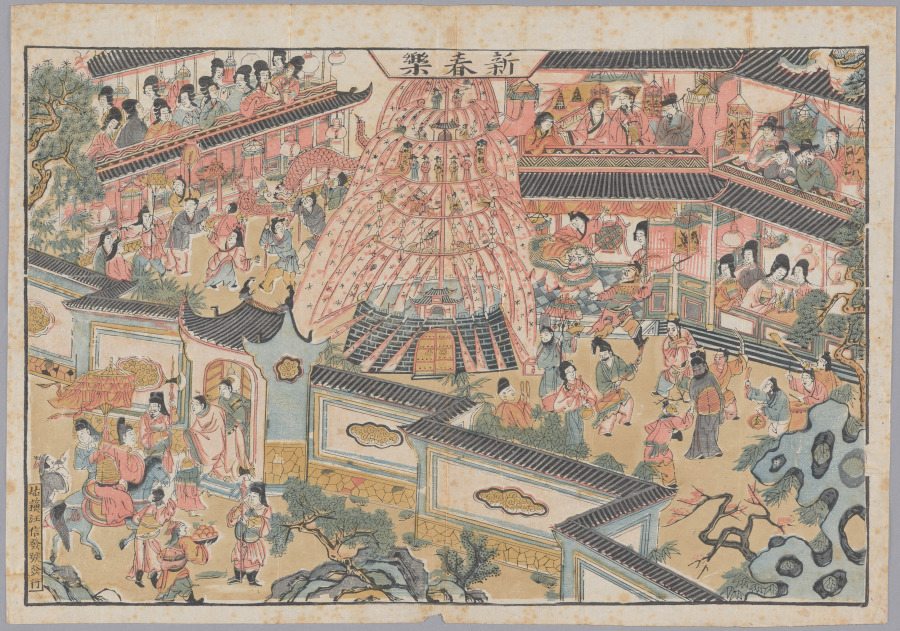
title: Happy New Year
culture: China, Qing dynasty (1644–1911), Kangxi reign (1622–1722)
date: 1662–1722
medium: Polychrome woodblock print; ink and color on paper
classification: Print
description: In the 1600s, printing flourished in such Jiangnan cities as Nanjing, Suzhou, Hangzhou, and Huizhou, evolving from privately enjoyed illustrated books printed in color to more commercialized single-sheet color prints that were hung on walls and became part of the rich urban visual culture.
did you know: Woodblock printing in color reached a height in China in the 1600s to 1700s. The prints were executed by means of sets of separate blocks, each carved to print a different color.